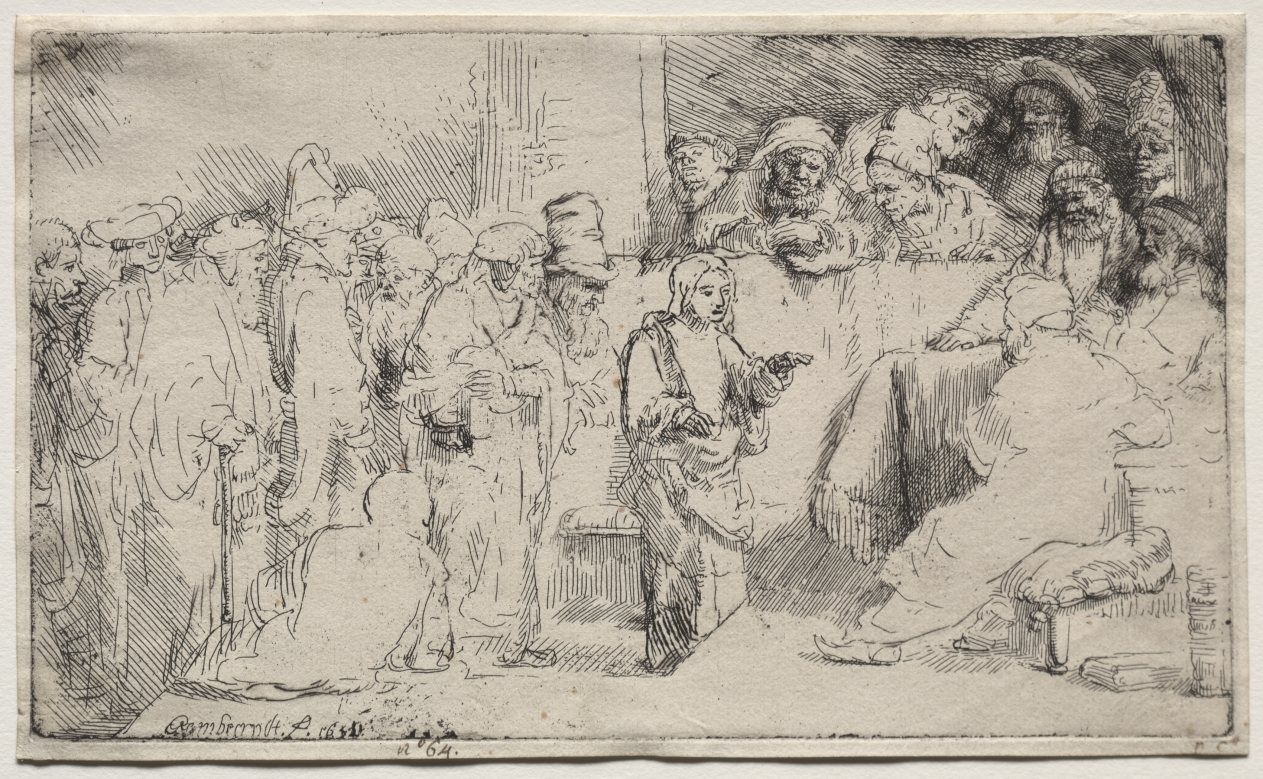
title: Christ Disputing with the Doctors: A Sketch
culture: Netherlands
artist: Rembrandt van Rijn (Dutch, 1606–1669)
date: 1652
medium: etching with drypoint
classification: Print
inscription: lower left, in plate: Rembrandt. f. 1652 ; lower left, in pen and brown ink: n°64. ; lower right, in pen and brown ink: n c# ; VERSO, center, in graphite: The very rare first state ; lower left, in graphite: 262 / 2 50[sideways] ; lower left, in graphite: a45[0?]25 ; lower left, in graphite: A76628 ; lower center, in graphite: extremely rare ; lower center, in graphite: w log ; lower center, in graphite: [single illegible character]/7[upside down] ; lower right, in graphite: EHO ; lower right, in graphite: B[illegible]